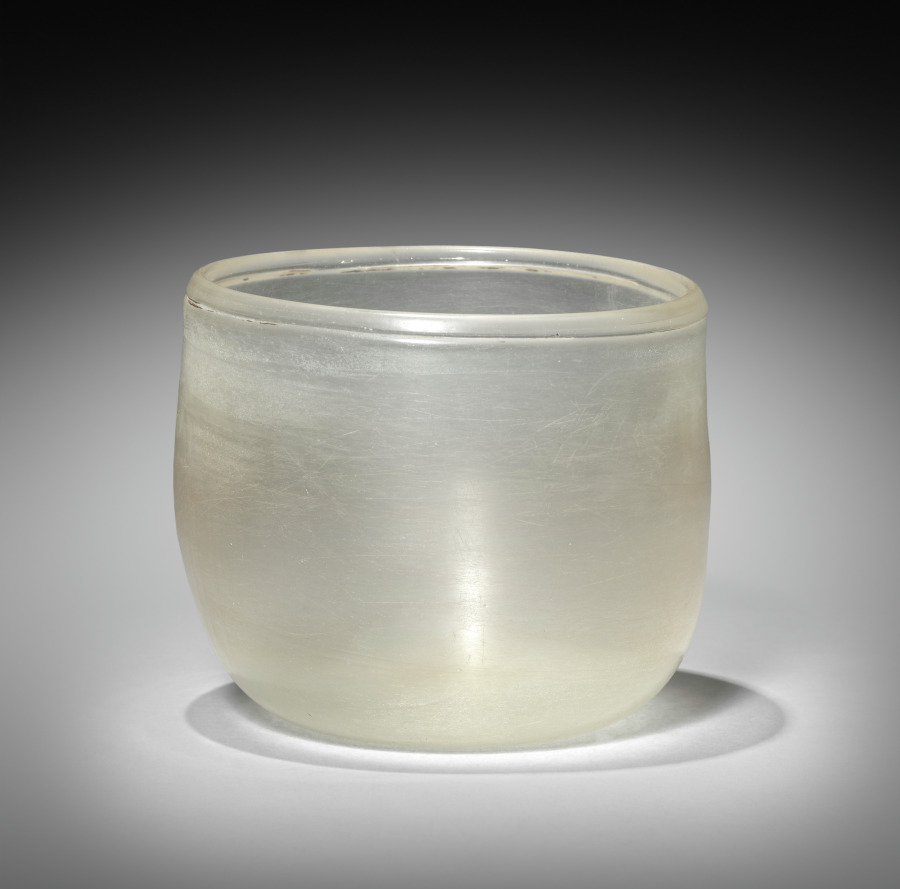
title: Bowl with Stand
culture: Syria, Roman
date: 100–400 CE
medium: glass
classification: Glass